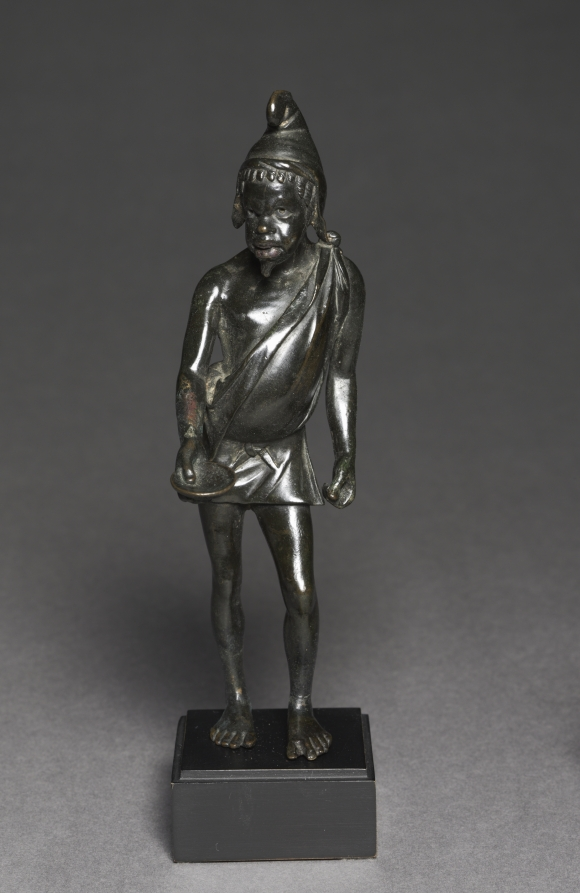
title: Statuette of a Black African Person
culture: Greece, Greco-Roman Period, late Ptolemaic Dynasty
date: 100–50 BCE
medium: bronze, solid cast, with silver and copper inlays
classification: Sculpture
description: Characterized as a Black African person by his hair, facial features, and unusually dark patina, this figure wears a non-Greek type of hat and a simple garment associated with lower classes. His stooped posture suggests that he may have a physical disability, something rarely depicted in Greek art. His right foot and right hand (with bowl) are modern restorations done before the statuette came to Cleveland, perhaps in the 1800s.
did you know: The intentionally dark patina contrasts with the inlaid silver eyes and copper lips.